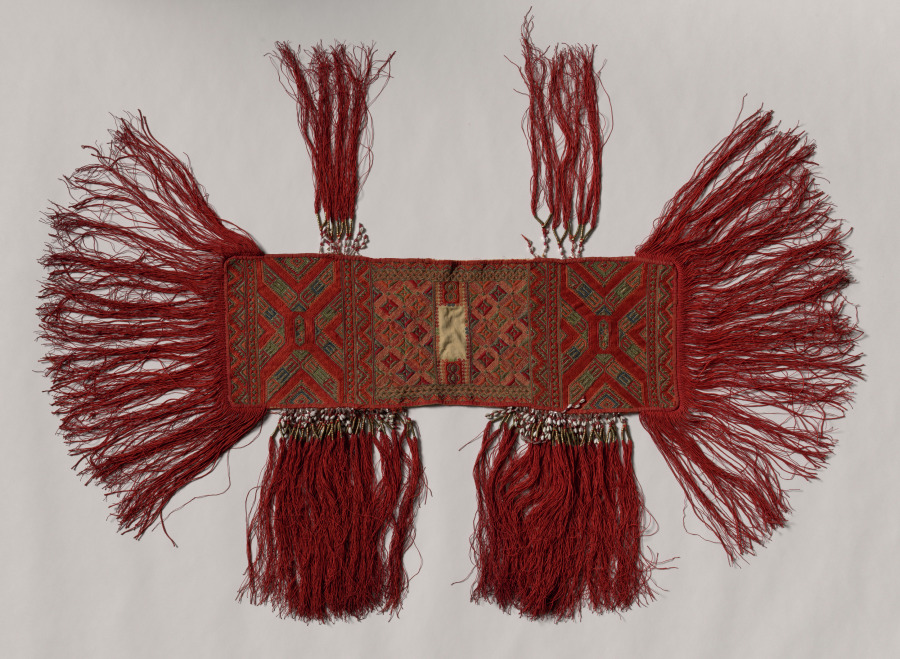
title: Garment or accessory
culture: probably southeastern Europe, Balkans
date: 1800s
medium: Silk, metal, dye, shells, glass, linen?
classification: Embroidery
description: This textile is densely covered with silk and metal thread embroidery, shells, and glass and metal beads. It has thick red fringes added on all sides. Its substrate (base layer) might be made from linen.